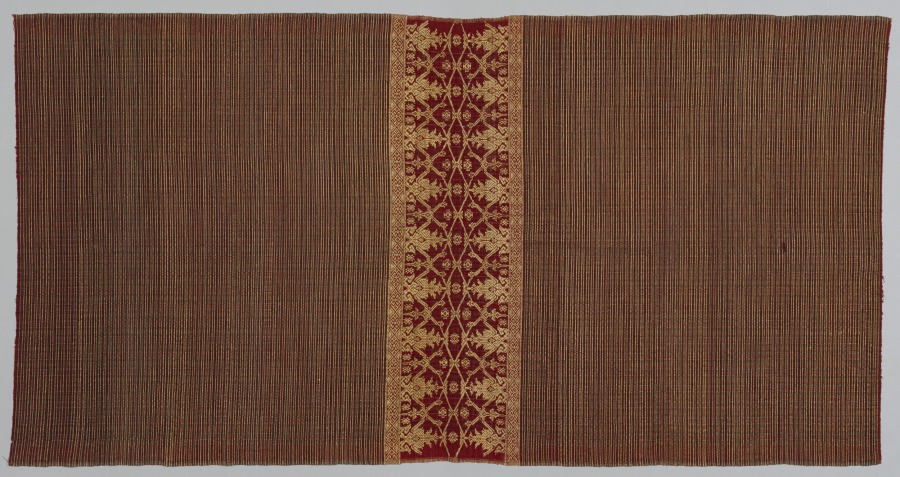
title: Wearing Cloth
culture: Indonesia, Bali, 19th century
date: 1800s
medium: tabby weave; brocaded cotton and Cyprian gold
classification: Textile